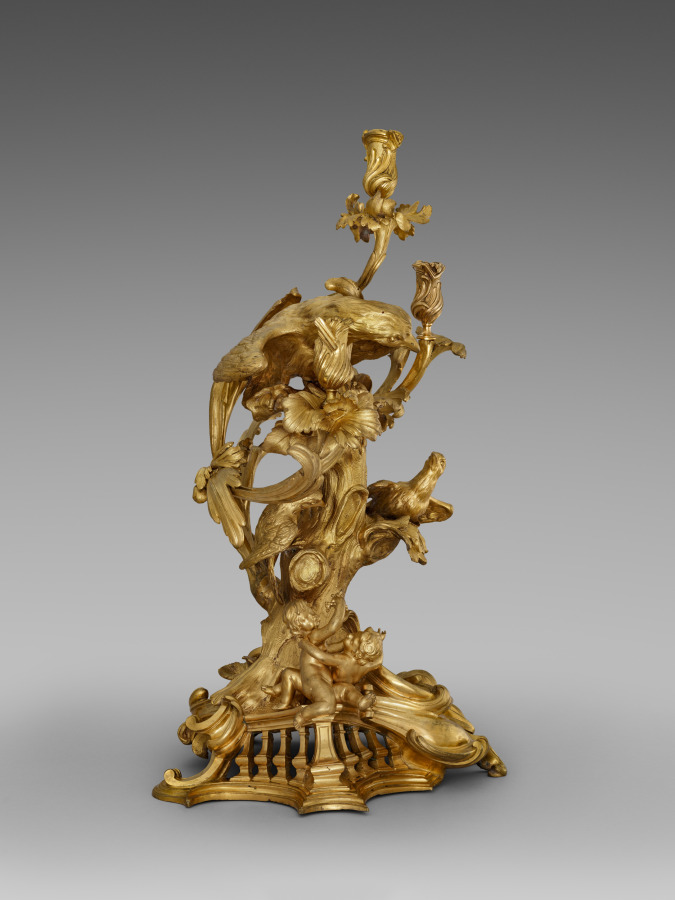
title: Candelabrum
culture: France, 18th century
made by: probably by Jean Joseph de Saint-Germain (French, 1720–1791)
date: c. 1750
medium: gilt bronze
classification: Furniture and woodwork